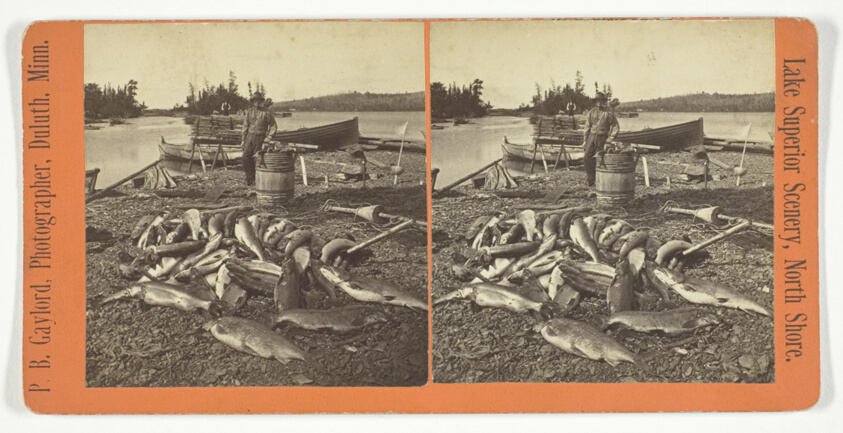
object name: Photograph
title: Lake Superior Scenery, North Shore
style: 19th century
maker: P.B. Gaylord (American, active late 19th century)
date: Late 19th century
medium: Albumen print, stereo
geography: Duluth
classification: photography; photograph; albumen silver print; stereograph (albumen)